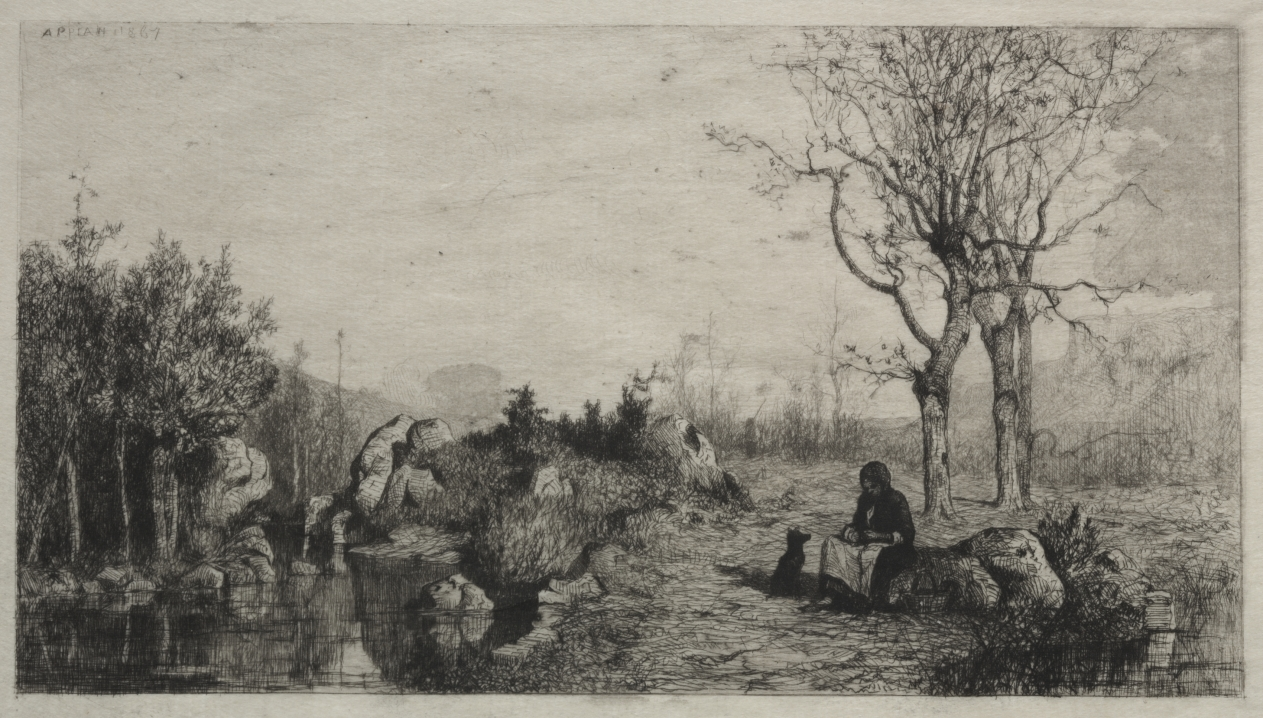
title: Shore of a Stream at Rossillon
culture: France, 19th century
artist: Adolphe Appian (French, 1818–1898)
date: 1867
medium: etching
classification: Print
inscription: upper left, in plate: Appian 1867